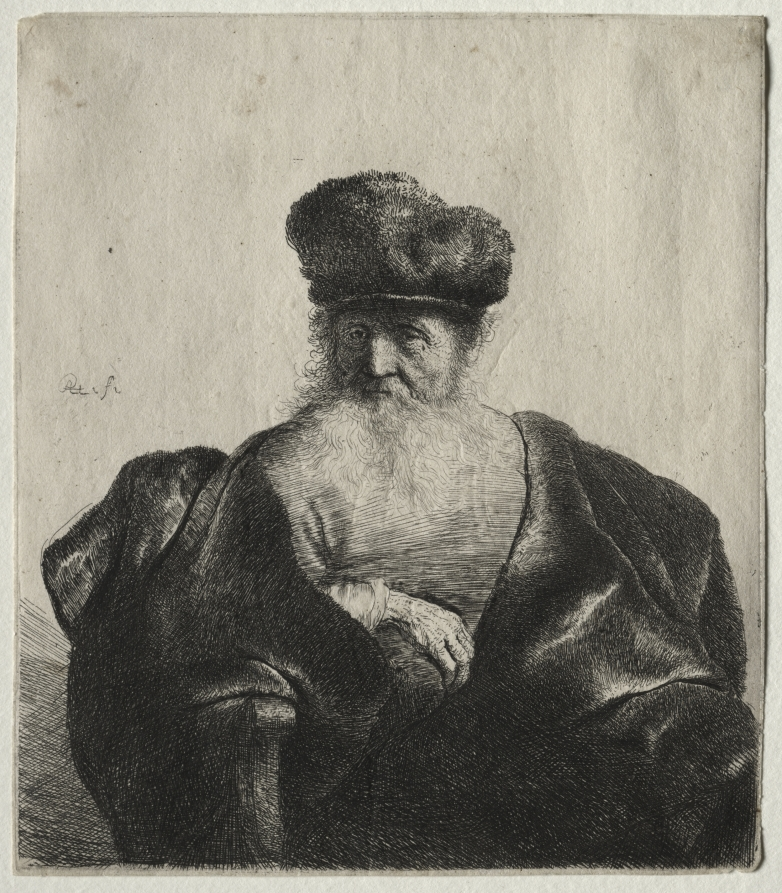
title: Old Man with Beard, Fur Cap, and Velvet Cloak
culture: Netherlands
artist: Rembrandt van Rijn (Dutch, 1606–1669)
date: c. 1632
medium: etching and engraving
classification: Print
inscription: center, in plate: RHL[in monogram]- f- ; VERSO, upper left, in graphite: 12 ; lower left, in graphite: a 62695 ; lower left, in graphite: 242[upside down] ; lower left, in graphite: 262 63 ; lower left, in graphite: 15 ; lower left, in graphite: a 82696 ; lower right, in graphite: 5570[underlined] ; lower left, in graphite: NCO ; lower right, in graphite: 1520/12[upside down]; lower right, in graphite: 10\